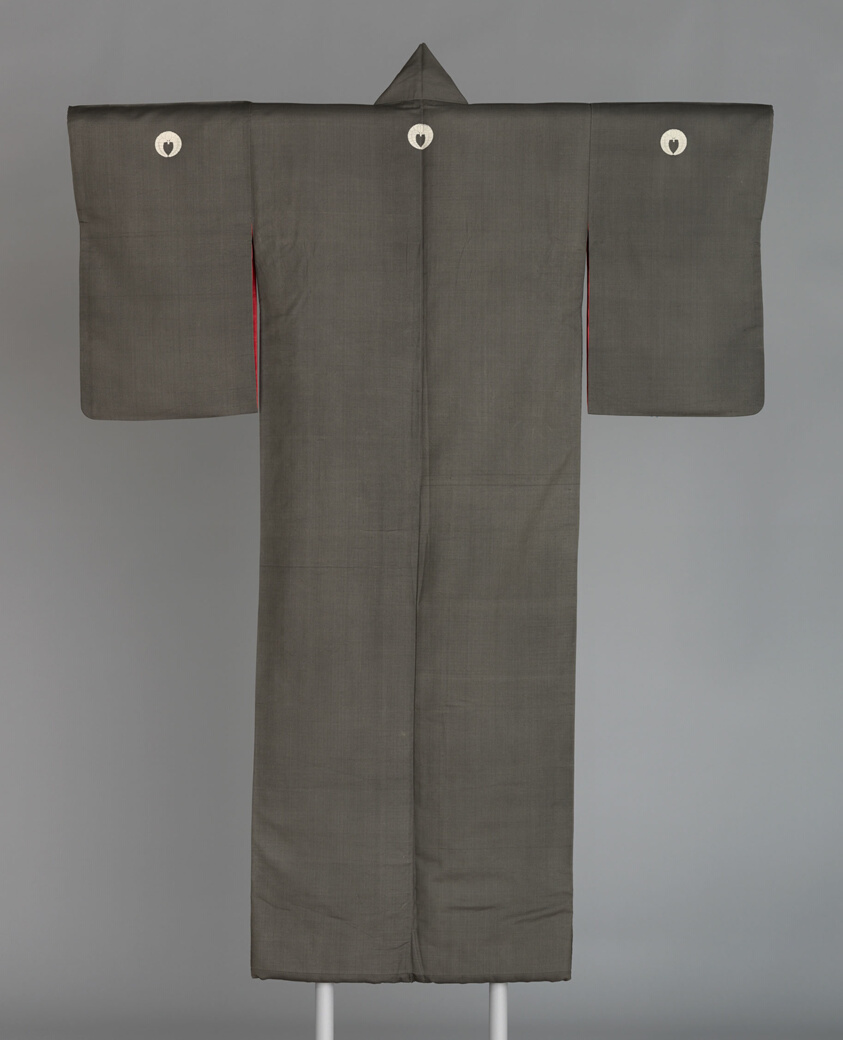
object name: Textile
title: Kuro Tomesode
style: meiji, Japanism, East Asian, asian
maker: Japan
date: Meiji period (1868–1912), c. 1880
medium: Silk, plain weave (heiken); resist dyed and painted (hon yûzenzome: tsustsugaki, bokashizome, hikizome); embroidered with silk, gold-leaf-over-lacquered- paper-strip-wrapped silk in individual back stitches, laid work and couching; upper body and sleeve lining silk, plain weave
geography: Japan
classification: textile; weaving - printed; costume; dress (garment); clothing